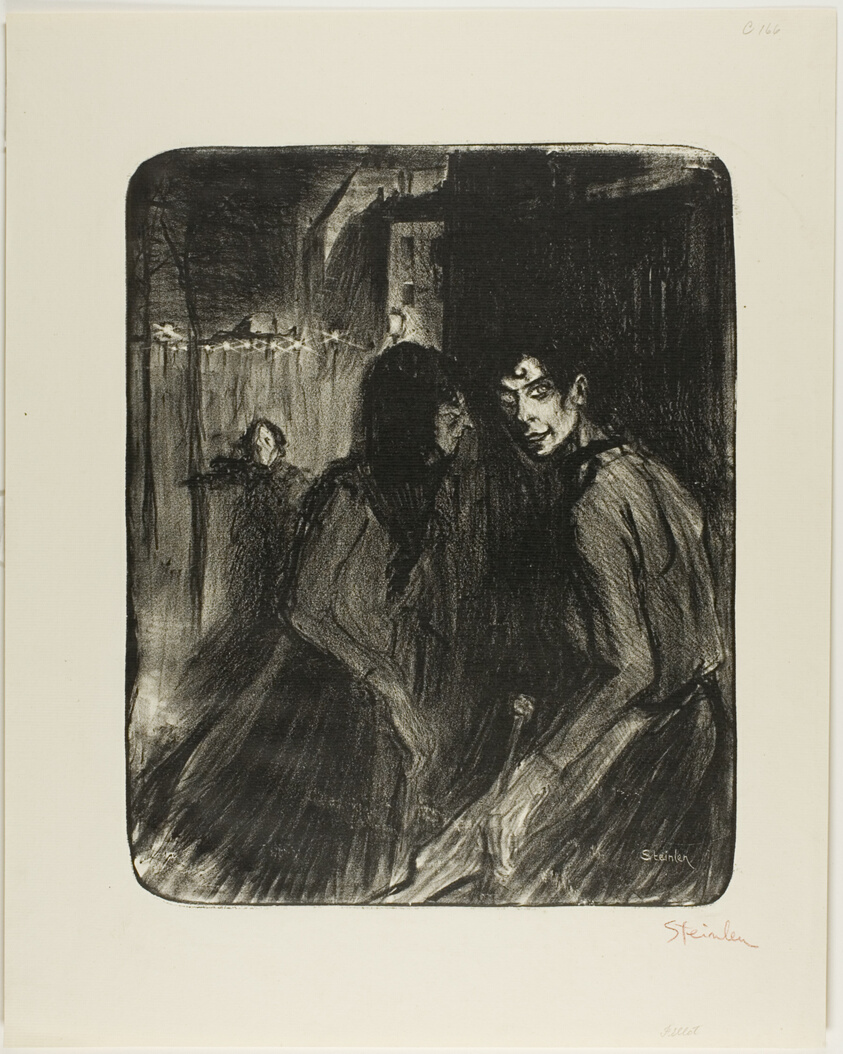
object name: Print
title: Arguing Prostitutes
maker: Théophile-Alexandre Steinlen; French, born Switzerland, 1859-1923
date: 1895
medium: Lithograph in black on ivory laid paper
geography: France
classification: lithograph; print; prints and drawing